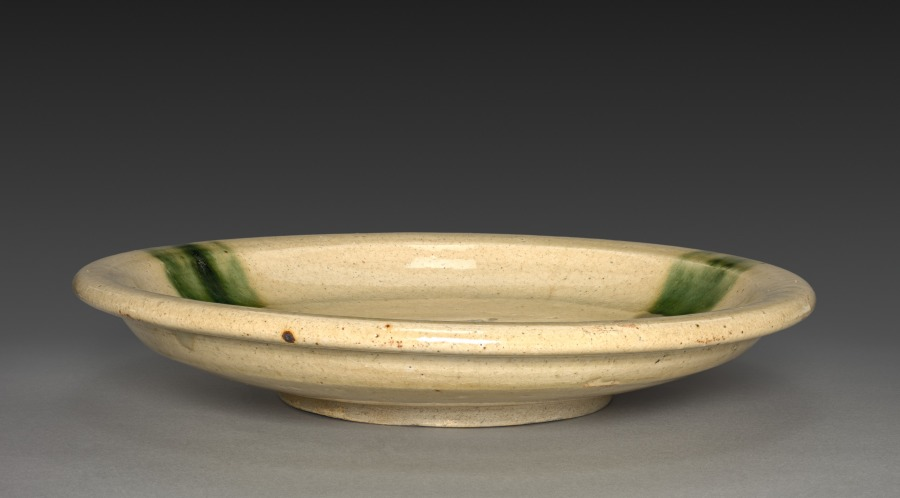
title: Plate: Seto Ware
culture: Japan, Edo period (1615–1868)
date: 1700s to mid-1800s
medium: glazed stoneware (Seto ware)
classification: Ceramic